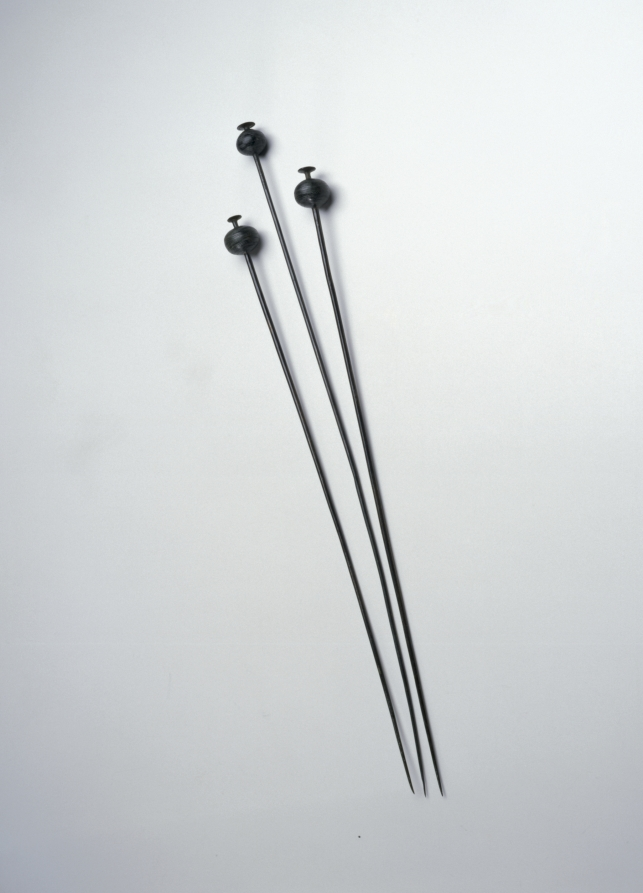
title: Garment Pin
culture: possibly Hungary, Bronze Age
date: c. 1400 BCE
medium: cast and wrought bronze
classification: Jewelry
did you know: This metal pin was used to fasten clothing.